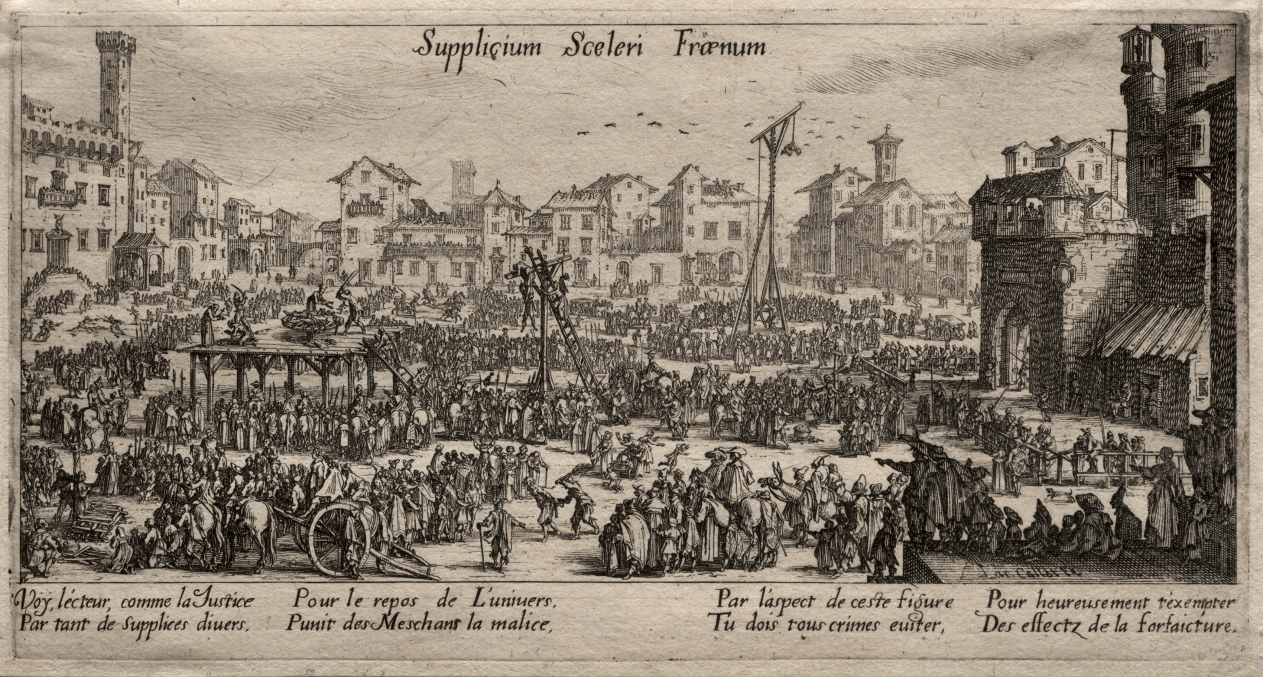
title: Supplicium sceleri Fraenum (The Punishments)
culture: France, 17th century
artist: Jacques Callot (French, 1592–1635)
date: ca. 1624–34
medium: etching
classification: Print